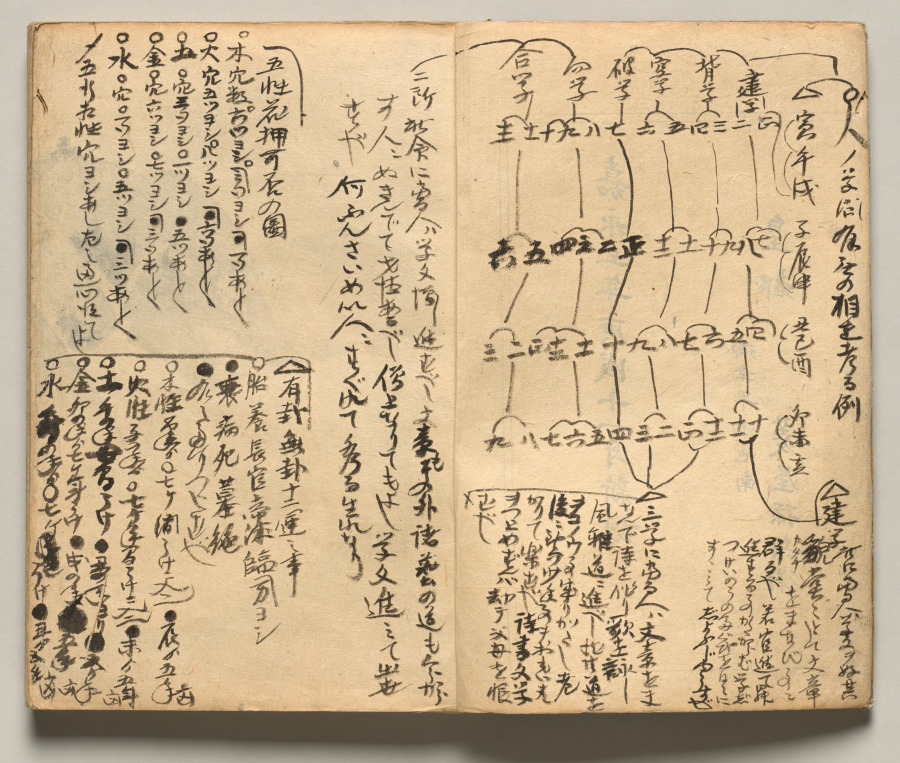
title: Ōkyo Picture Book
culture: Japan, Edo period (1615–1868)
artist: after Maruyama Ōkyo (Japanese, 1733–1795)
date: 1850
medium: accordion-style woodblock printed folding-book; ink and color on paper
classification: Bound Volume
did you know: This impression of a book of woodblock-printed designs is missing a spread that depicts a crane.